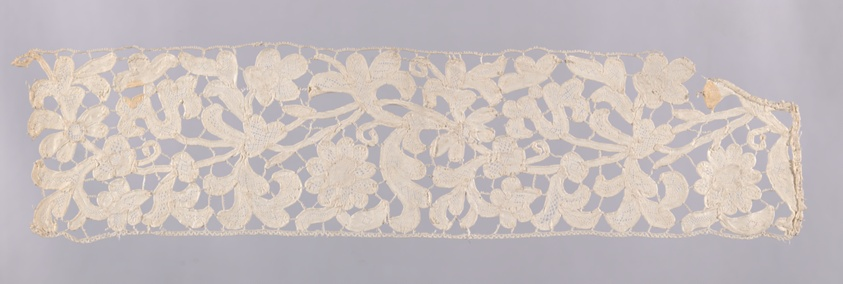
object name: Textile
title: Border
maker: Northern Europe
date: 1701/25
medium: Linen, needle lace on woven tapes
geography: Northern Europe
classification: textile; lace - mixed; lace